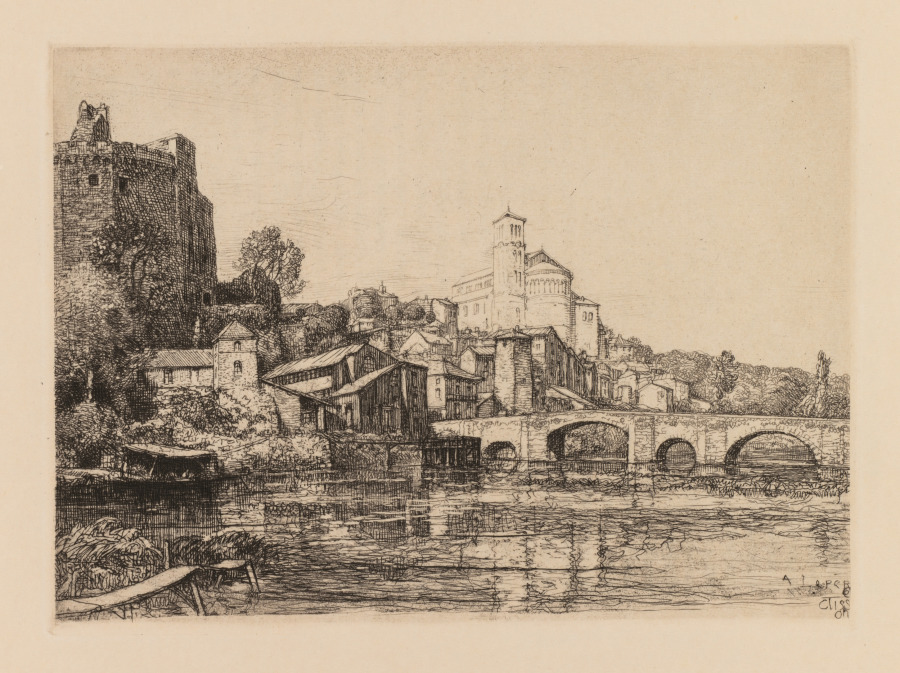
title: Auguste Lepère: Clisson (Loire-Maritime)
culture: France, 20th century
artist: Auguste Louis Lepère (French, 1849–1918)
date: 1931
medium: Etching, from bound volume with seven etchings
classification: Bound Volume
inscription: On tissue guard, on plate, lower right: 360. Clisson. On plate, within image, lower right: A Lepè / re / Cliss / on